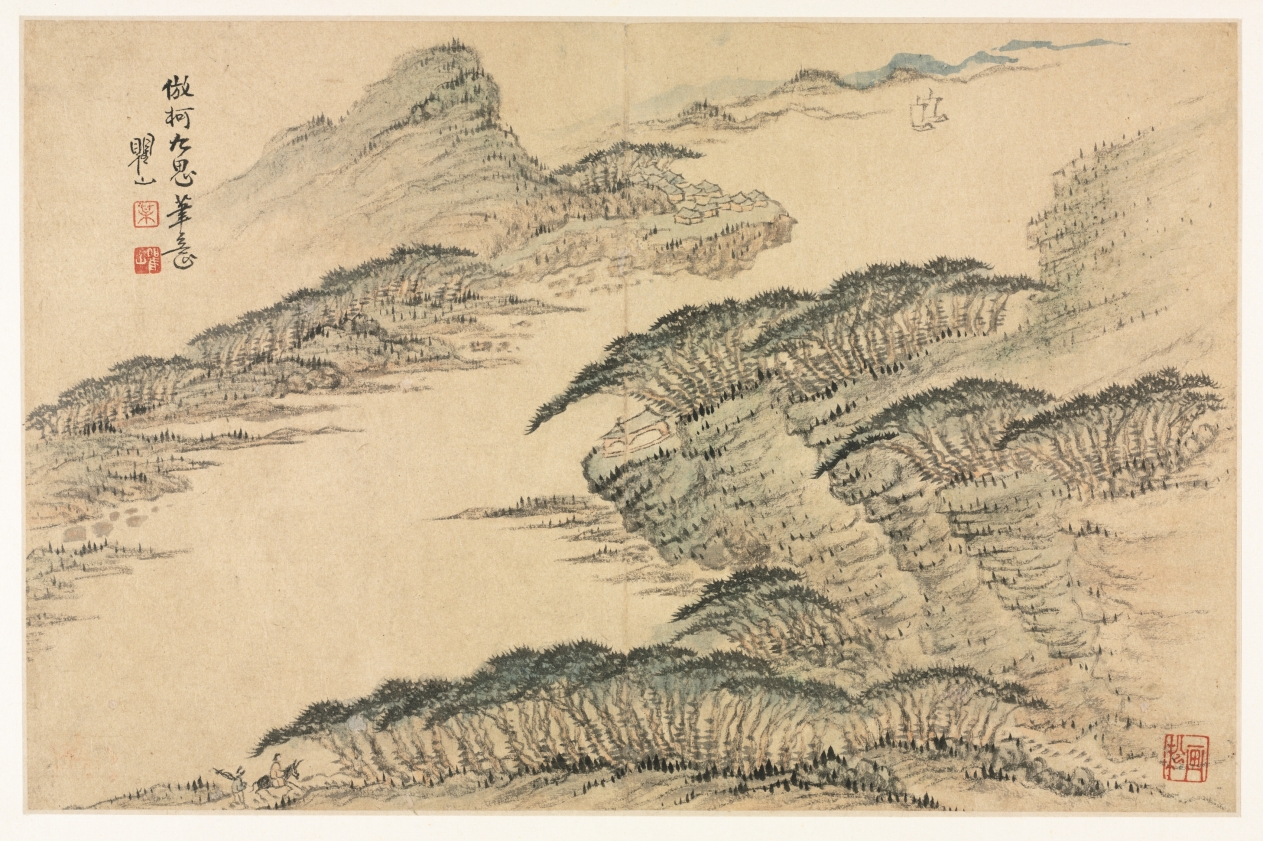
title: Landscapes in Various Styles after Old Masters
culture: China, Qing dynasty (1644-1911)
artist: Mei Qing (Chinese, 1623–1697)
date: 1690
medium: album leaf: ink and color on paper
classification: Painting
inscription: Spring Leaf I (formerly Leaf G). Artist's inscription, signature, and seals: Imitating Ke Jiusi's brush idea. Qushan [2 seals] Mei; Qushan [seal, lower right corner] Huasong.